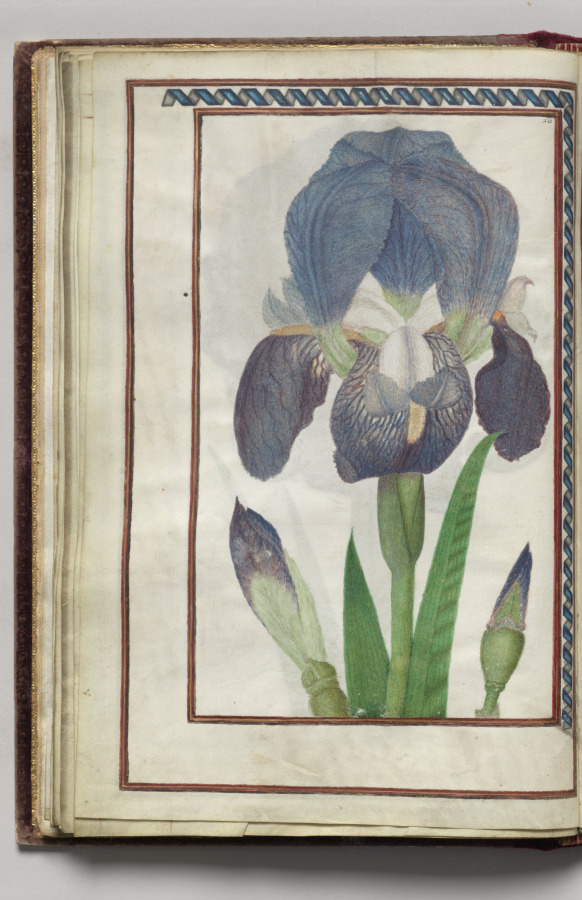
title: Blue and White Iris, folio 15 (verso), from Florilegium (A Book of Flower Studies)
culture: France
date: 1608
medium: watercolor, ink, silver, and gold over occasional traces of pencil, on vellum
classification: Bound Volume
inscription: Dated: Poitiers 1608 (on frontispiece) Signed: On frontispiece in black ink, lower right: Van Kuyk Notation on drawing: Frontispiece: in pencil, lower margin: * élève de Van Kessel, peintre flammand (* in pencil also appears in front of Van Kuyk's name).